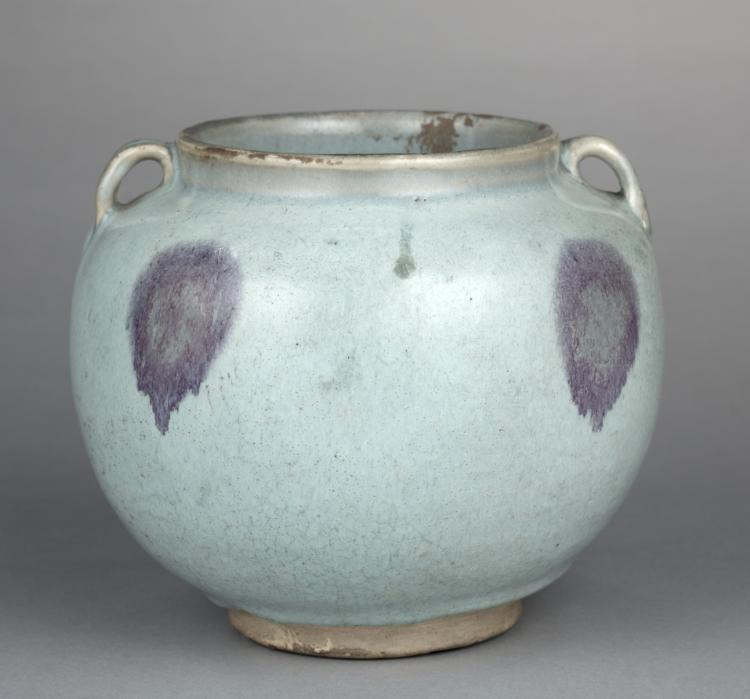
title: Two-Eared Jar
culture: China, Henan province, Yuxian, Jin dynasty (1115-1234) - Yuan dynasty (1271-1368)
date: 1200s-1300s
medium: Porcelaneous stoneware with blue glaze and splashes of purple, Jun ware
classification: Ceramic